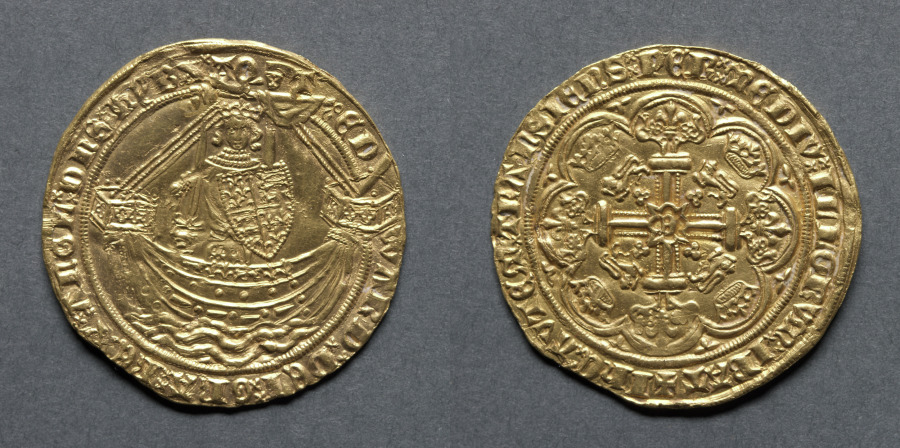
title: Noble: Edward III Standing in Ship with Shield of Arms (obverse); Ornamental Cross with Lis Terminals (reverse)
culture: England, Edward III, 1327-1377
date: 1363–69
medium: gold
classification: Coins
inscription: EDWARD DEI GRA REX ANGL DNS HYB Z AQT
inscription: IHC. AVTEM TRANSIENS PER MEDIV. ILLORVM IBAT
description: Part of the "Treaty Series" of coins, this is a reference to the Treaty of Bretigni, signed between England and France on May 8, 1360. It was negotiated because of the continued successes of Edward III in his continental wars. Among many other territorial points agreed, the English renounced their pretensions to the crown of France. This affected the king's titles as shown on the coinage. On previous coins the king's titles were "Edward, By the Grace of God of England, France, and Ireland King." Now they read, "Edward, by the Grace of God of England and Ireland, King, Duke of Aquitaine." The treaty was later broken and on the "post-treaty" period nobles the title of King of France was resumed.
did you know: In the center of the cross on the reverse of this coin is a letter E for Edward.